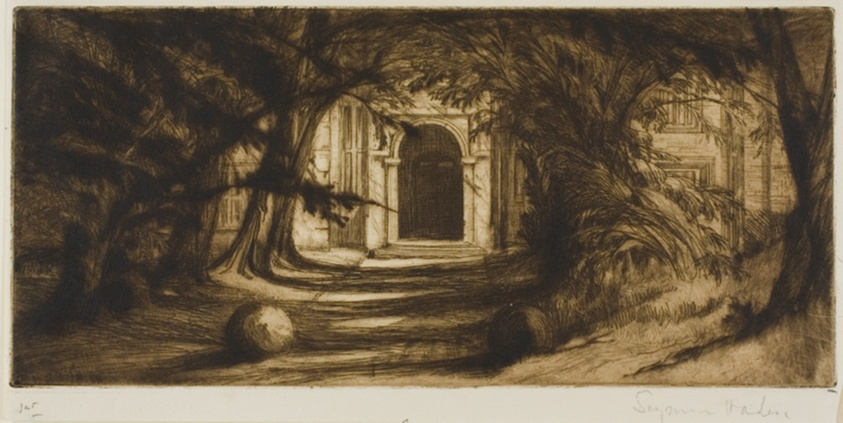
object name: Print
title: Mytton Hall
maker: Francis Seymour Haden (English, 1818-1910)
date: 1859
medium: Drypoint in brown ink on ivory laid paper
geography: England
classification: etching; print; prints and drawing